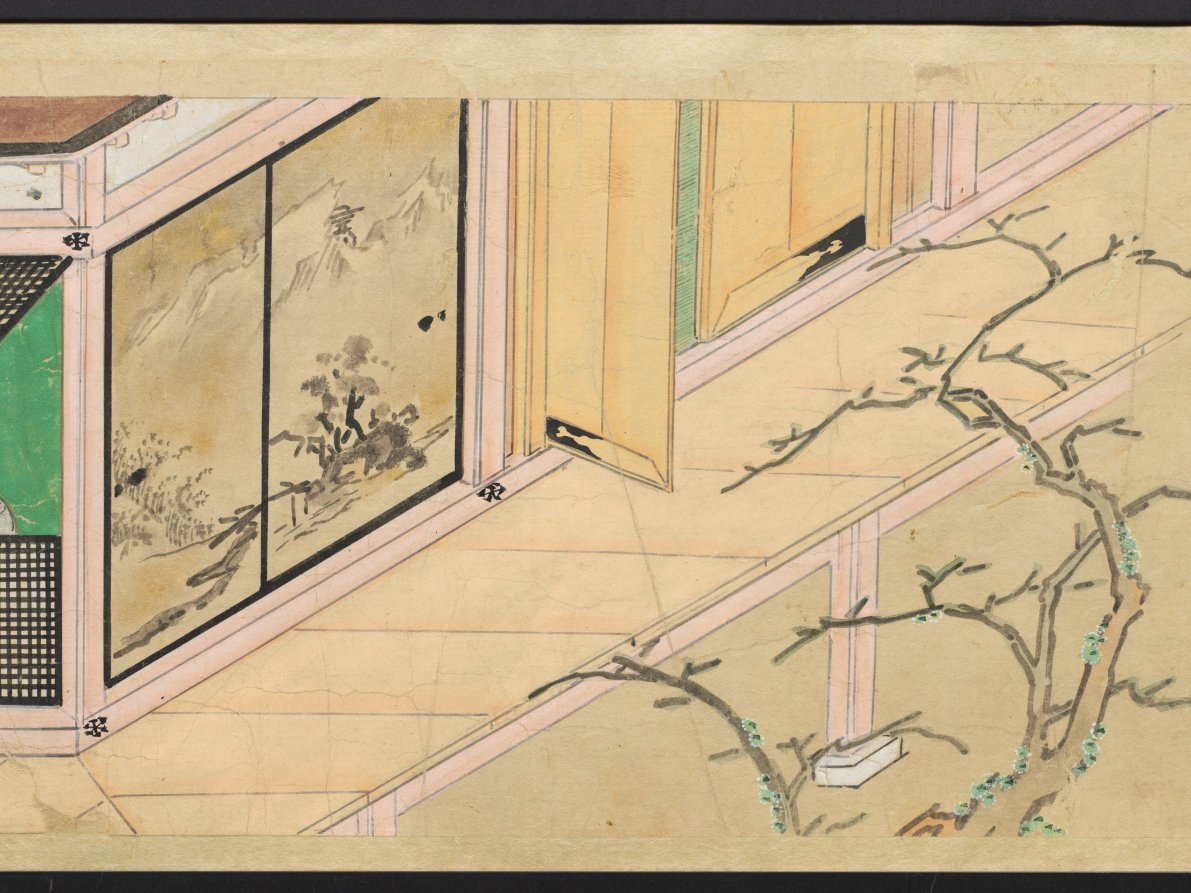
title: The Saltmaker's Story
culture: Japan, Edo period (1615–1868)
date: early 1600s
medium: One of a pair of handscrolls; ink, color, and gold on paper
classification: Painting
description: Once read and copied by girls at New Year’s celebrations and included in dowries, The Saltmaker’s Story is a rags-to-riches tale in which daughters are gifts from the gods. Despite his simple outlook, the main character progresses from humble roots as an associate at Kashima Shrine to the elite status of grandfather of the emperor through the intervention of the Kashima deity. The Saltmaker’s Story is traditionally presented in a set of three scrolls, but the text of this set has been removed by a previous owner, who remounted the illustrations as a pair. The paintings of this one take us from right to left through the second half of the tale.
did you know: This handscroll originally had texts before its paintings, but the texts were removed.